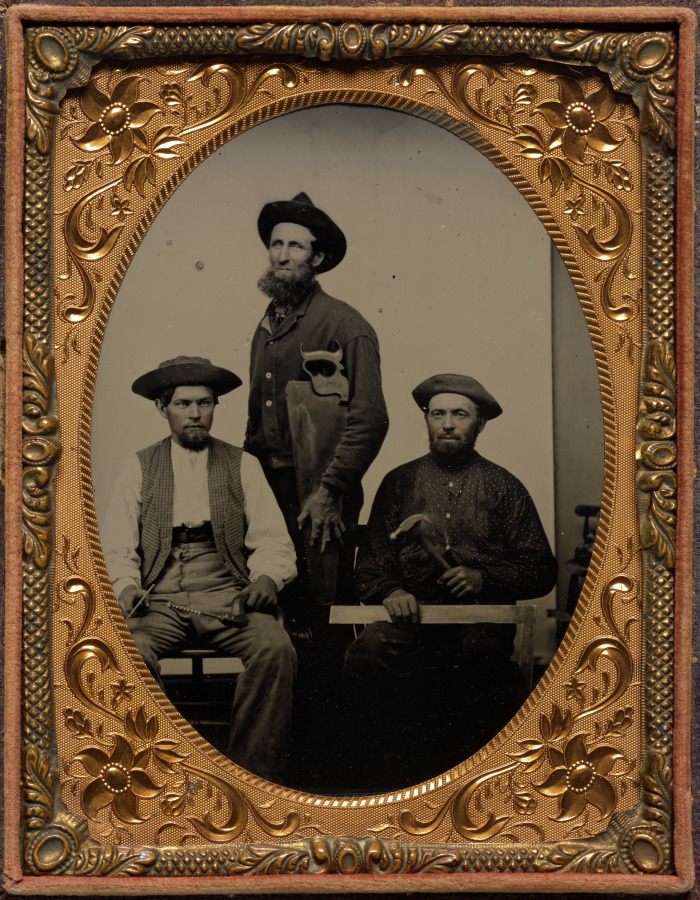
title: Three Carpenters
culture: America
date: c. 1858–65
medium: ambrotype, quarter plate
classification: Photograph